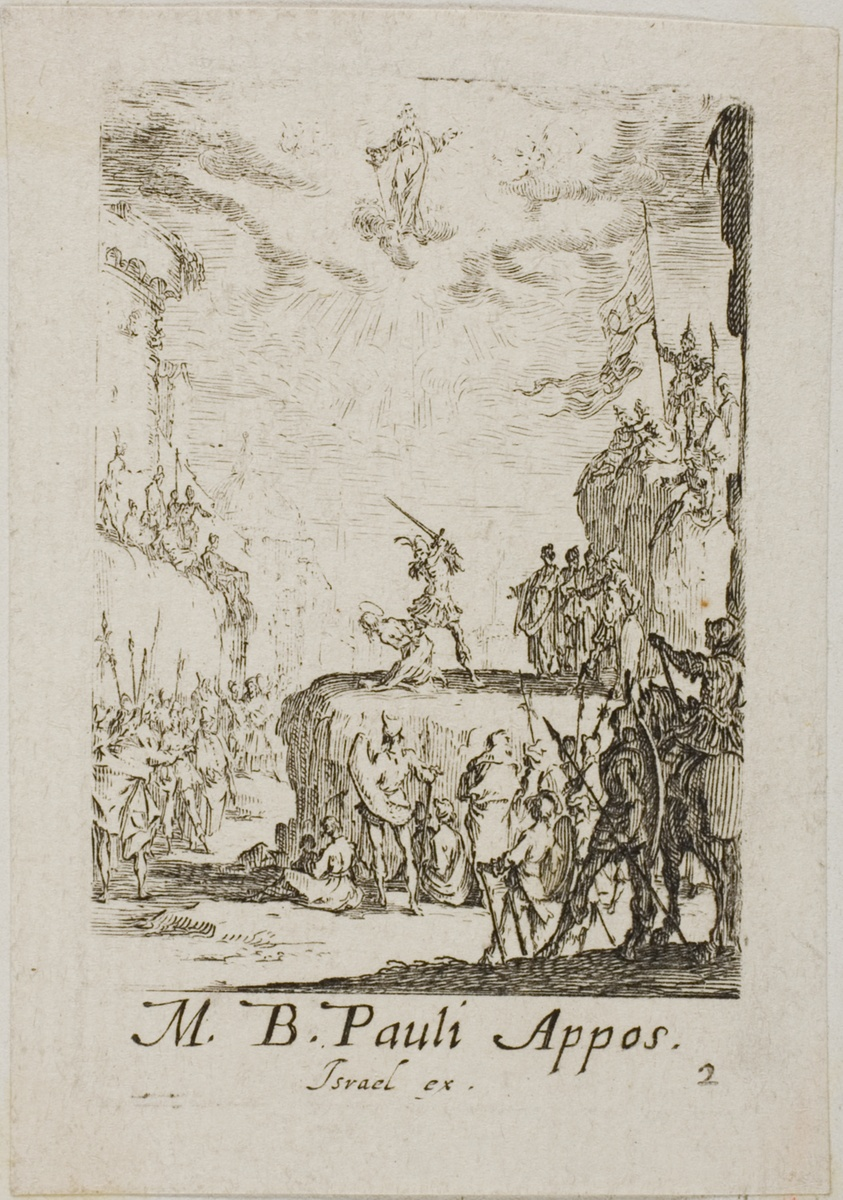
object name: Print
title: The Martyrdom of Saint Paul, plate two from The Martyrdoms of the Apostles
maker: Jacques Callot (French, 1592-1635)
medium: Etching on paper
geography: France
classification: etching; print; prints and drawing